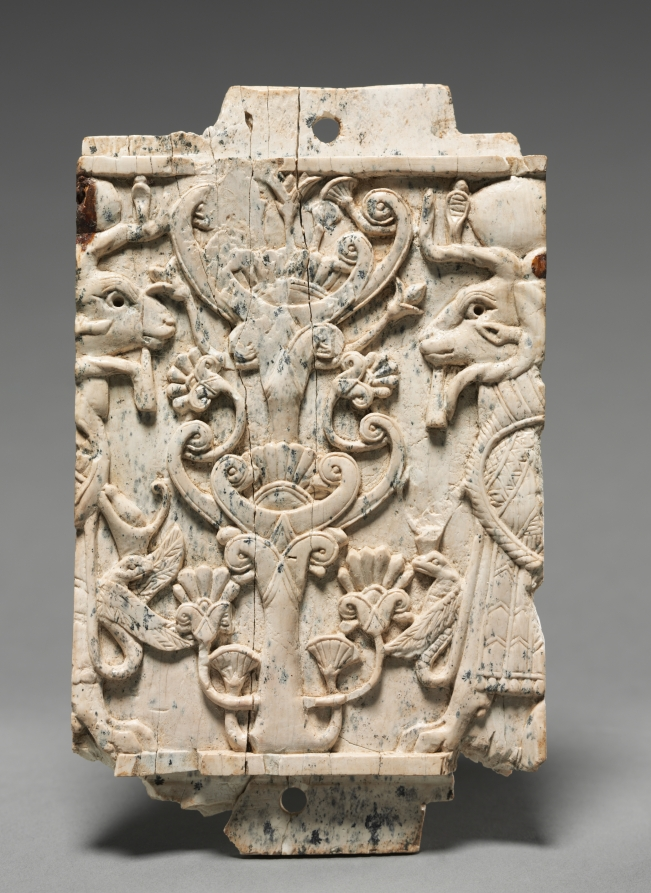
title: Decorative Plaque: Ram-Headed Sphinxes Flanking a Sacred Tree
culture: Phoenicia, Iraq, Nimrud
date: 900–800 BCE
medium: ivory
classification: Ivory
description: This small plaque was executed in the Phoenician style with symmetrical compositions, elongated figural proportions, and Egyptian subjects and motifs. Examples have been found throughout the Middle East, but thousands come from Nimrud where most were excavated in the storerooms of a military arsenal built by King Shalmaneser II (858-824 bc). When the Nimrud palace was sacked in the 7th century bc, these ivories were thrown into a well, where Sir Max Mallowan (the husband of Agatha Christie) discovered them in 1951. The monumental wall relief (1943.246) was found at the same Assyrian palace at Nimrud.